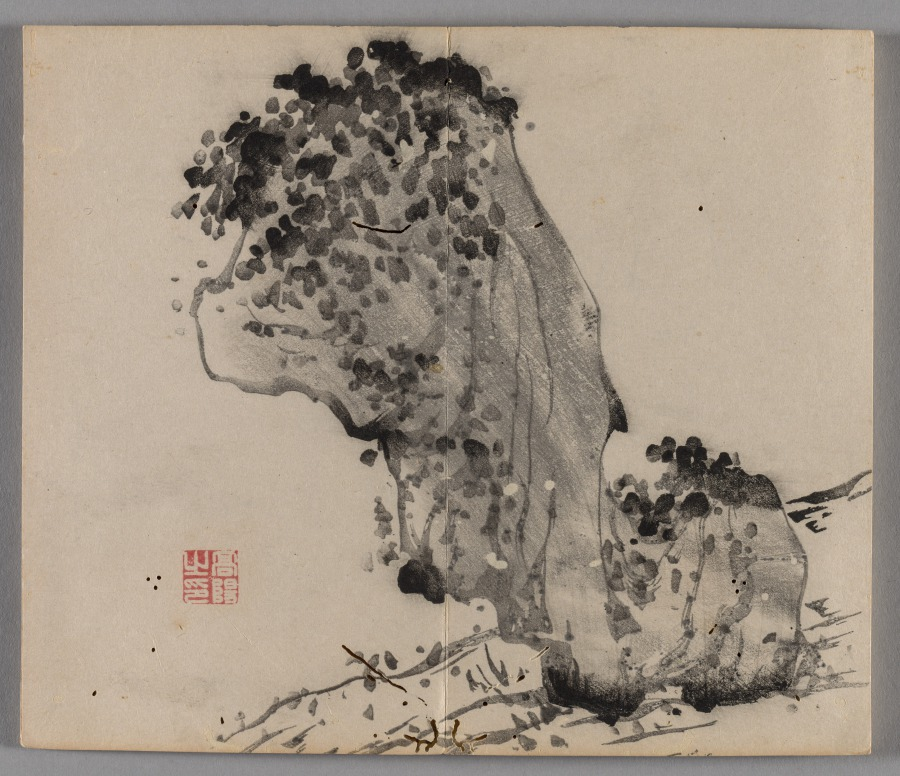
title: Ten Bamboo Studio Painting and Calligraphy Handbook (Shizhuzhai shuhua pu): Rocks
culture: China, Qing dynasty (1644-1911)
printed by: Hu Zhengyan (Chinese, c. 1584–1674)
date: 1633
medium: Woodblock-printed book; ink and colors on paper; first edition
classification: Print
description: Color printing reached a level of perfection in the early 1600s, as seen in this Ten Bamboo Studio Collection of Calligraphy and Painting and the Mustard Seed Garden Manual of Painting (printed 1679 and 1701). The painterly quality, precision in registering (aligning) the woodblocks, and harmonious colors made them the most successful color print editions in Chinese history. Both editions were printed and compiled in Nanjing, spread nationwide, and had a great impact on the arts in Japan and Korea.